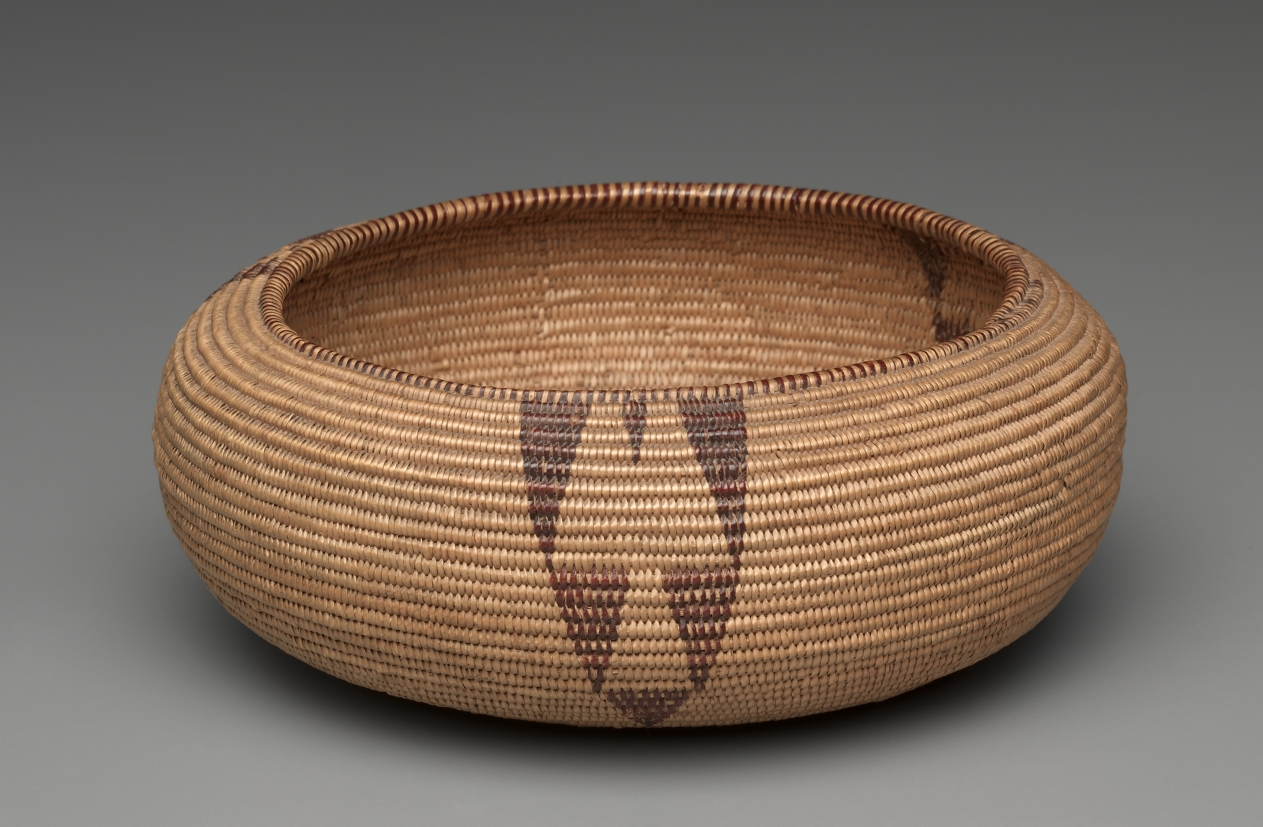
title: Bowl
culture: Great Basin, Washoe, Late 19th- Early 20th century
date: 1890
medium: Redbud, Willow; coiled (3 rods)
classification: Basketry